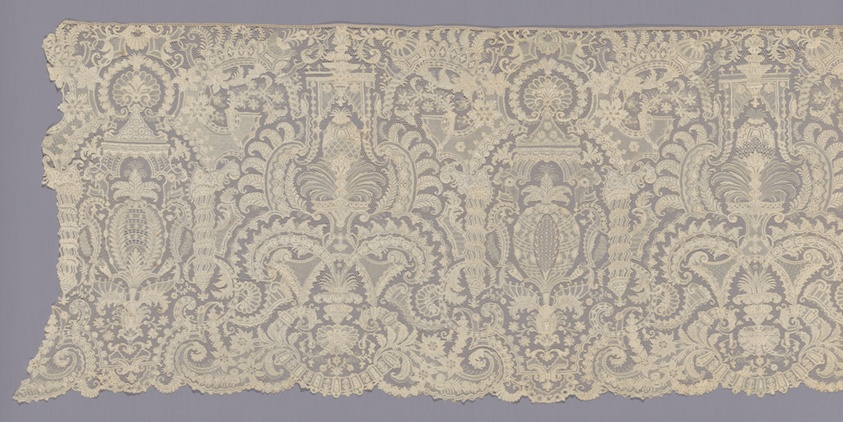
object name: Costume and Accessories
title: Flounce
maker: France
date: 1701/25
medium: Linen, needle lace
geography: France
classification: textile; lace - needle; costume component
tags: fashion, arabesque, cartouches, columns, pineapples